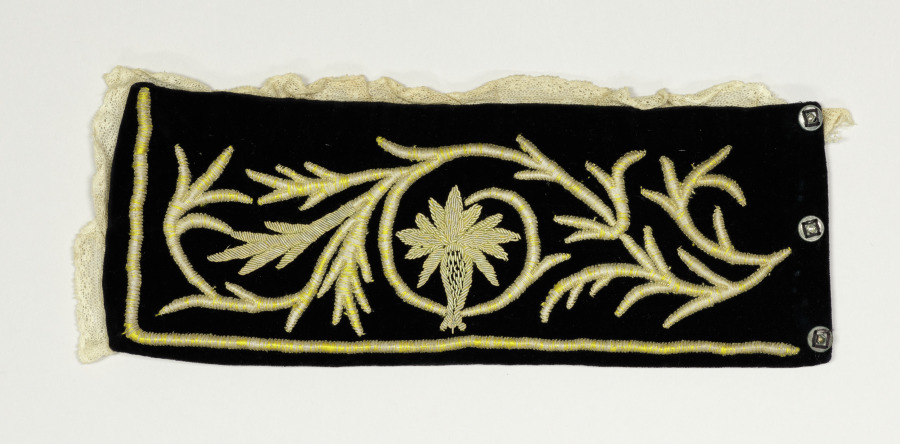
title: Woman's Costume (Cuff)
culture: Italy, Sicily, 19th century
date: 1800s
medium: velvet (black) with metal thread embroidery and lace edging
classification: Garment